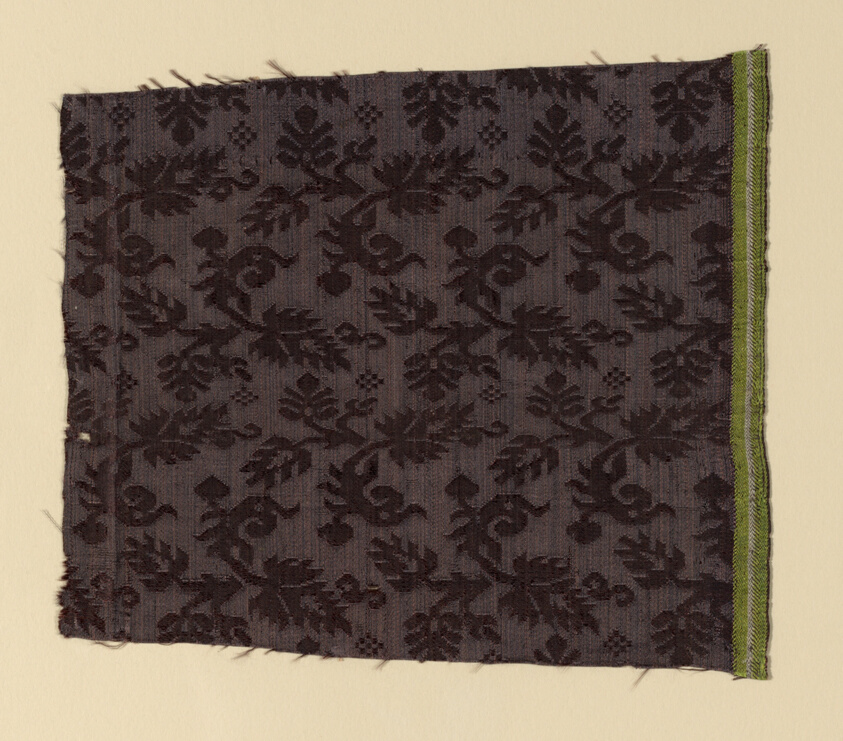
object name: Textile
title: Fragment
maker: Italy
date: 1601/50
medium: silk damask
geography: Italy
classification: textile; weaving